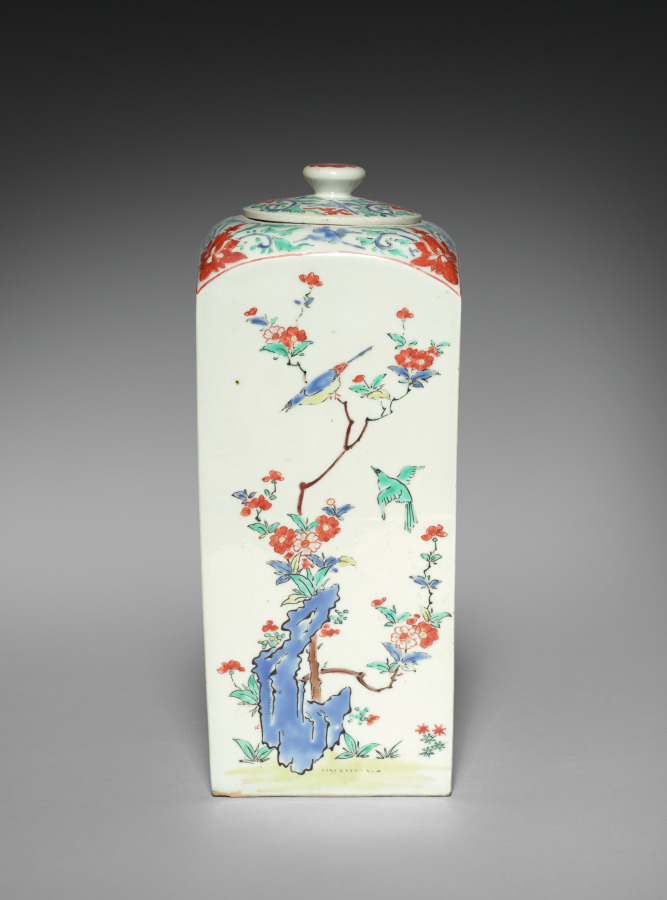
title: Square Jar with Birds and Flowers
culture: Japan, Edo period (1615–1868)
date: late 1600s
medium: Porcelain with overglaze color enamels and gold (Hizen ware, Kakiemon type)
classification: Ceramic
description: This lidded square jar was likely paired with a complementary yet nonidentical mate. The pine tree, plum, and bamboo together form the frequently depicted motif known as the Three Friends of Winter (shōchikubai), so named because of their hardy perseverance in the cold. Each side also features a pair of birds, including cranes on one face and pheasants on another.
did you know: A jar like this was fired at a high temperature, painted with colored enamels, and then fired again at a lower temperature.